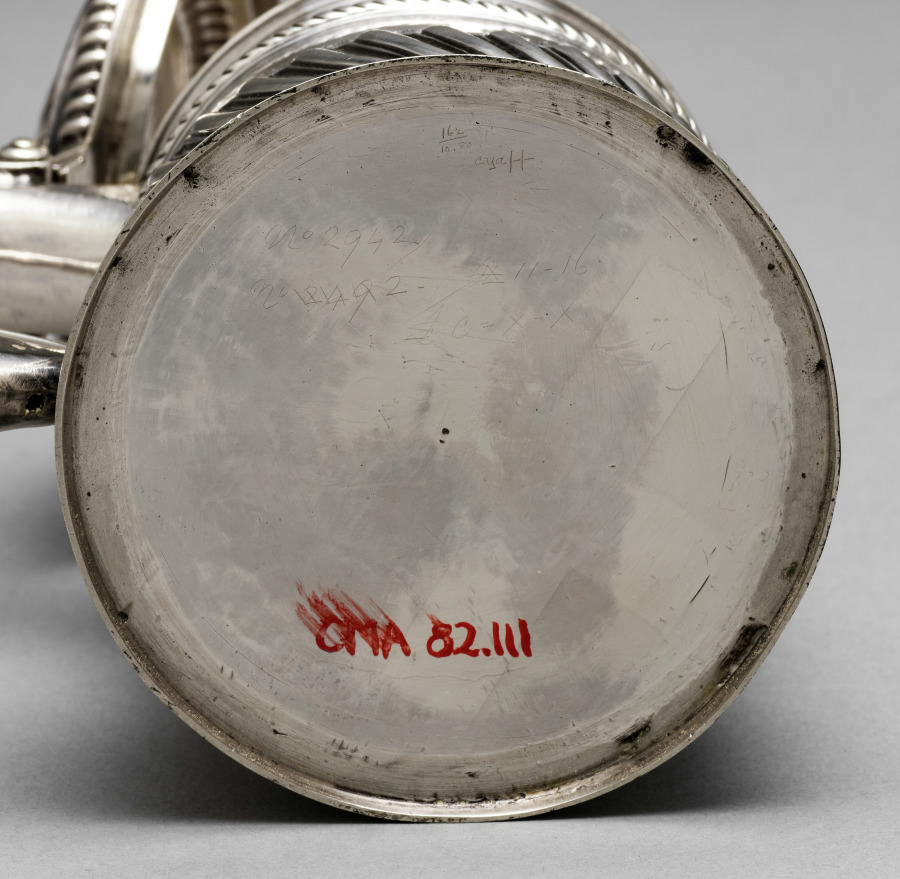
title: Tankard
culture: England, London, early 18th Century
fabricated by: Thomas I Parr (British)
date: 1701–1702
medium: silver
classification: Silver